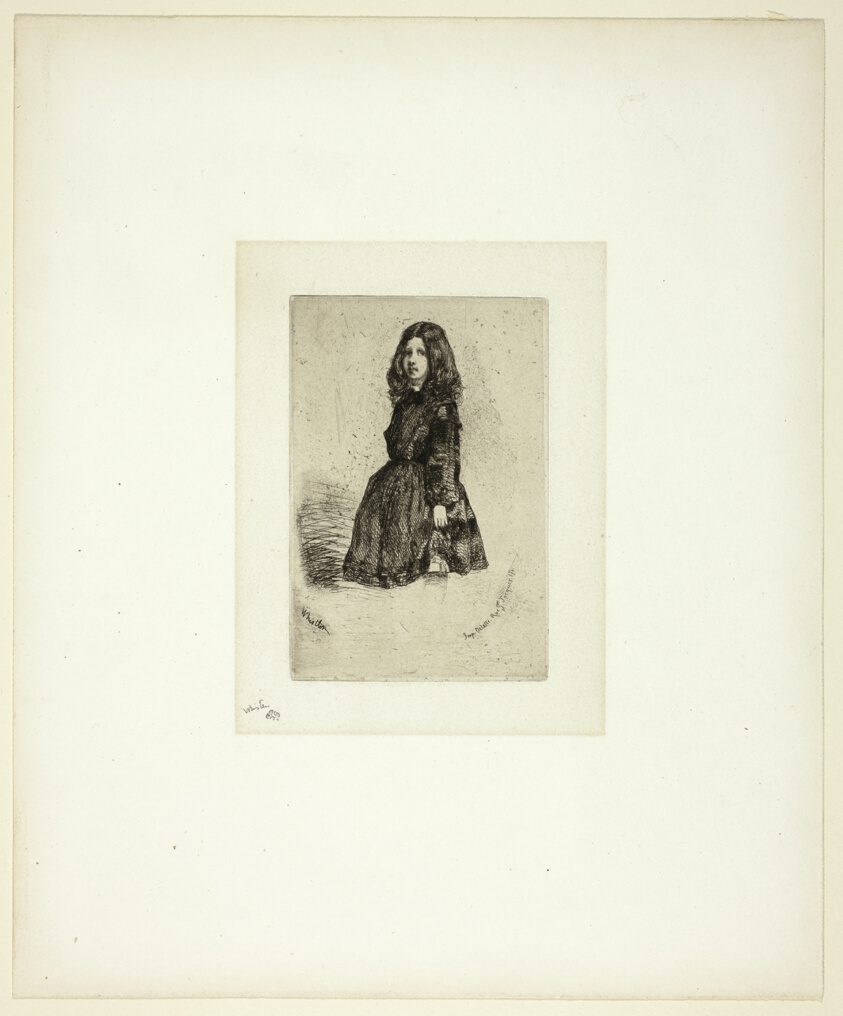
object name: Print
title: Annie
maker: James McNeill Whistler (American, 1834-1903)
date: 1857/58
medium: Etching with foul biting in black ink on off-white China paper laid down on off-white wove paper (chine collé)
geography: United States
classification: etching; foul biting; print; prints and drawing; paper